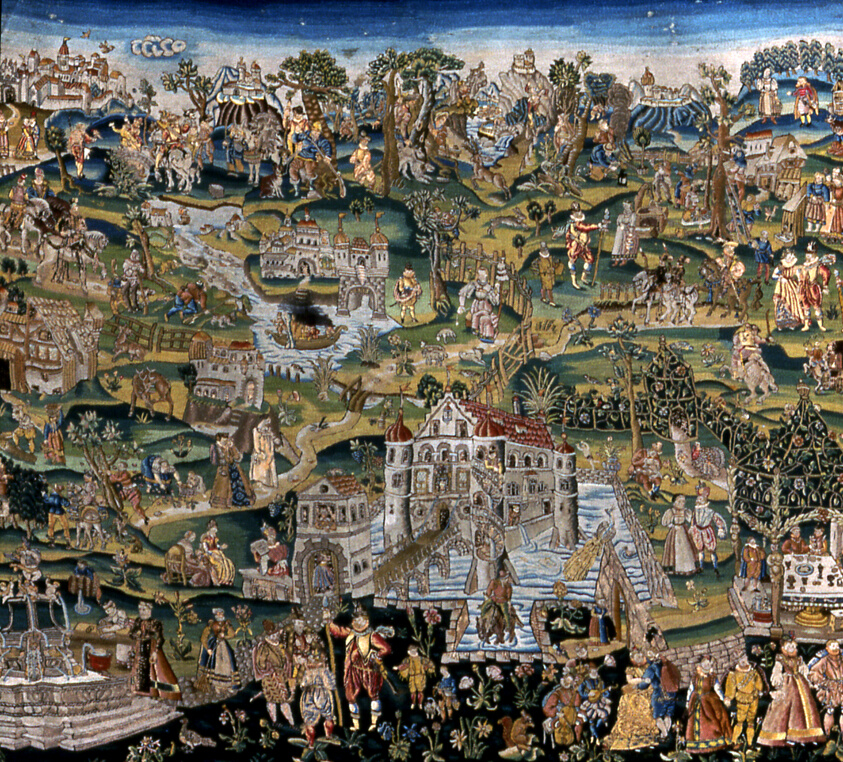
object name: Textile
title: A Day in the LIfe of a French Nobleman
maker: France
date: 17th century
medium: Linen, plain weave; embroidered with wool, silk, gold- and silver-gilt-strips-wound-around-silk-fiber cores, metal purl and linen in bullion, outline and running stitches; couching, Roumanian couching and laidwork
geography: France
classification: textile; needlework (visual works)